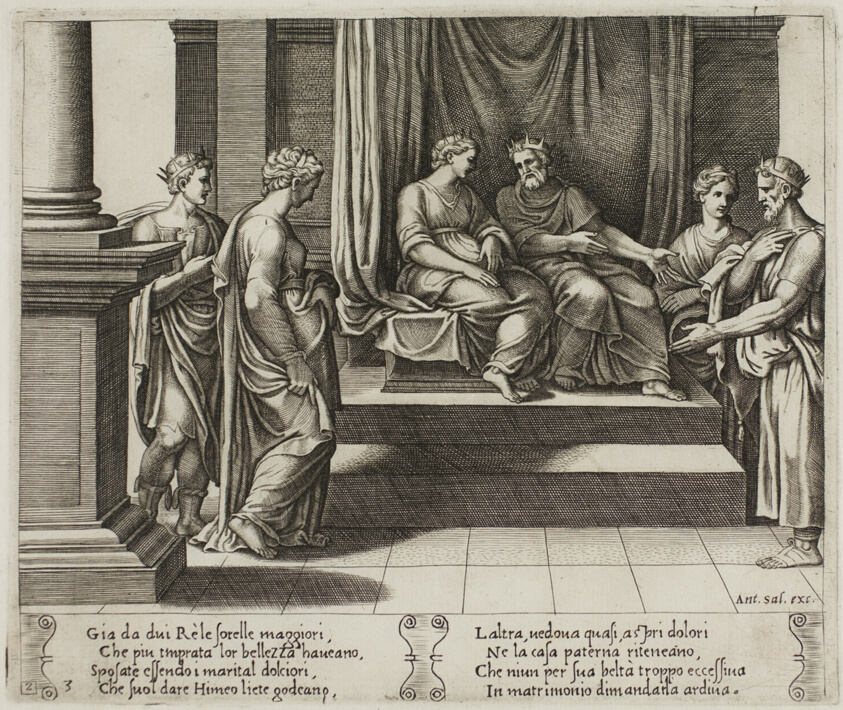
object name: Print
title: The Two Sisters of Psyche are Married to Kings; ...Psyche is Presented to a King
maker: Master of the Die (Italian, active c. 1530-1560); after Michiel Coxcie I (Flemish, 1499-1592); in turn, inspired by Raffaello Sanzio, called Raphael (Italian, 1483-1520)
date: 1530/40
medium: Engraving in warm brown ink on cream laid paper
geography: Italy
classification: engraving; print; prints and drawing